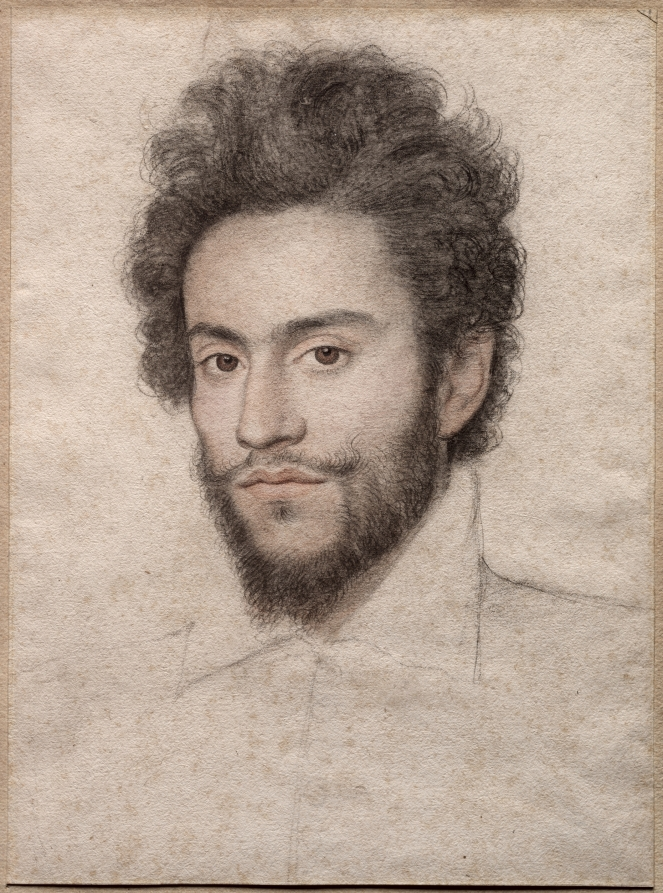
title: Young Man with a Beard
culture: France, 16th century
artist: attributed to François Quesnel (French, 1543–1619)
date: 17th century?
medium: black, red, brown, and white chalk with stumping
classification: Drawing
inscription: VERSO, lower left, in graphite: ChW ; SECONDARY SUPPORT, upper left, in brown ink: 16.